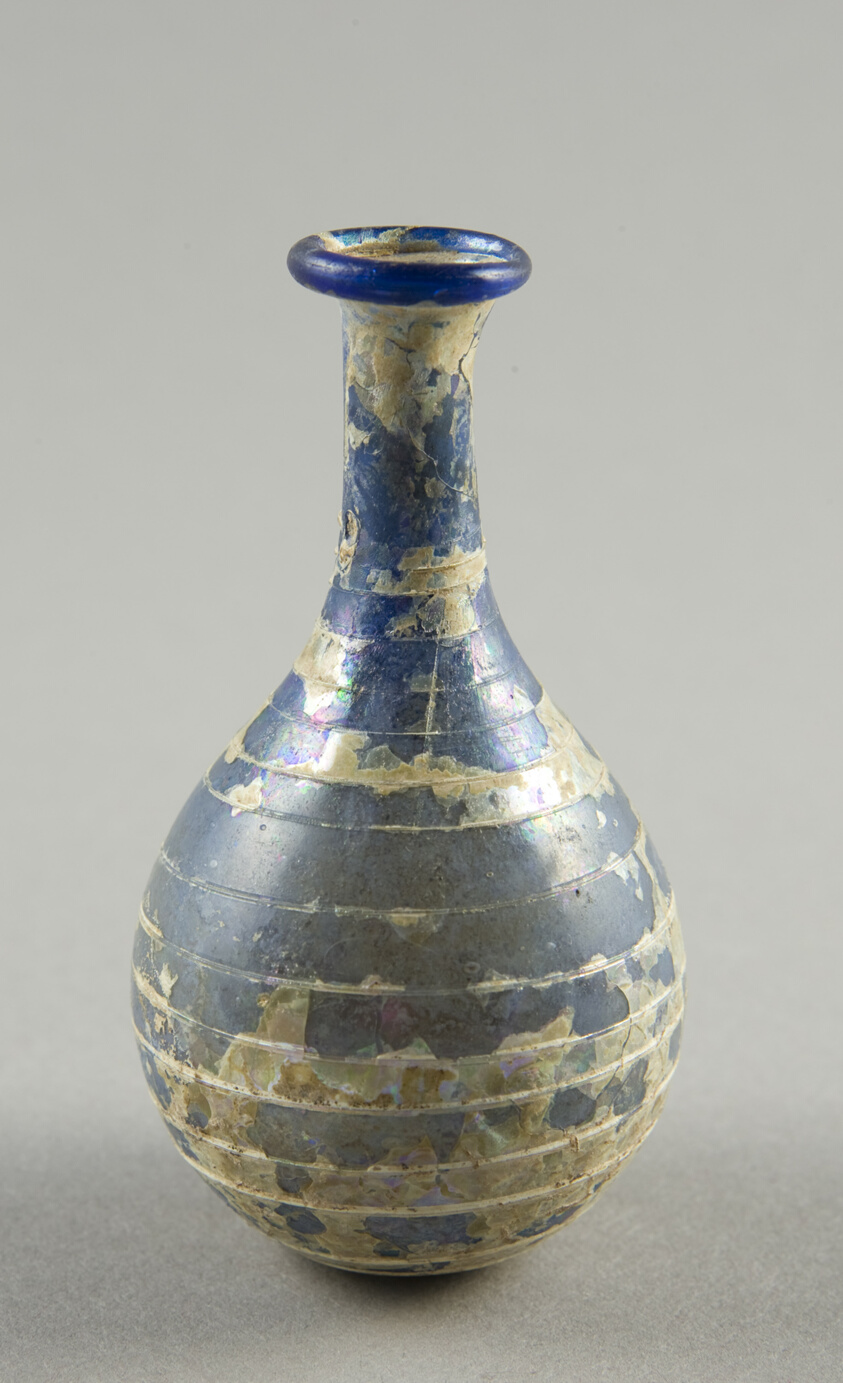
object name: Vessel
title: Vase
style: roman (ancient, style or period), ancient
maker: Roman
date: 1st century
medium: Glass, blown technique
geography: Italy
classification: glass; vessel; ancient art